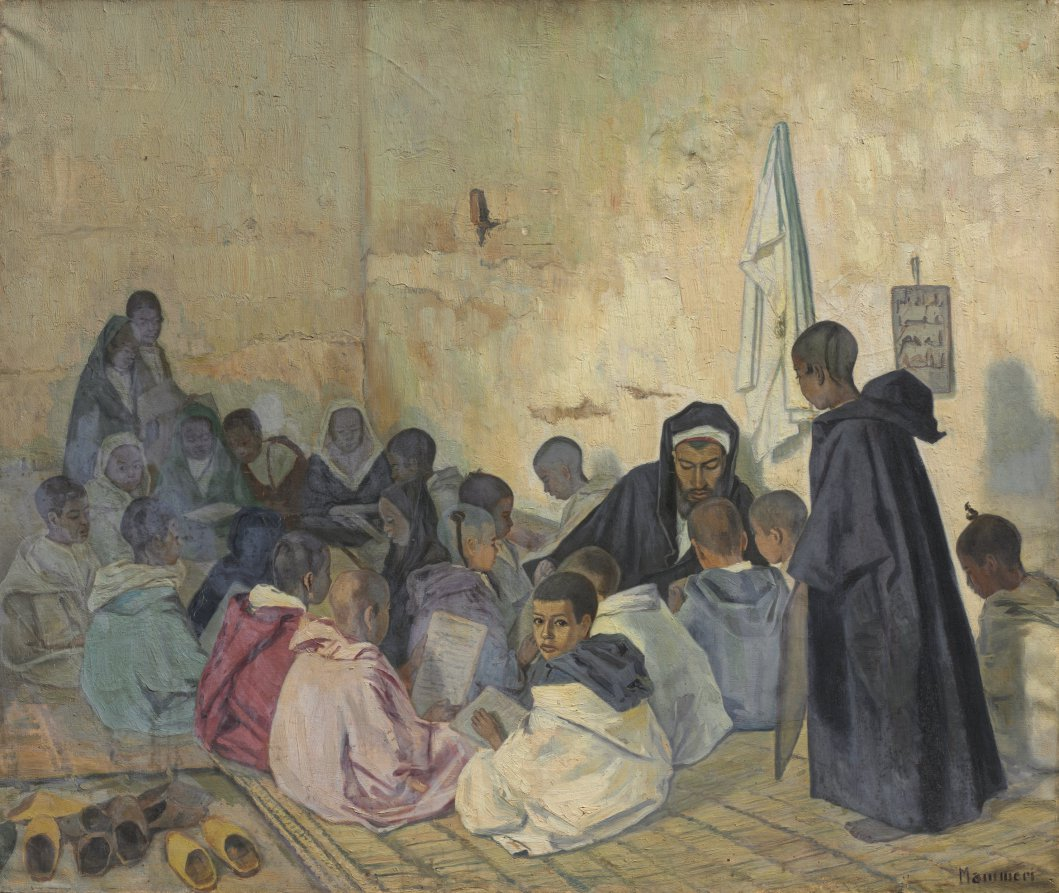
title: Interior of a School Coranique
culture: Algeria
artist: Si Azouaou Mammeri (Algerian, 1890–1954)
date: 1900s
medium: oil on canvas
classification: Painting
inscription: signed lower right: Mammeri